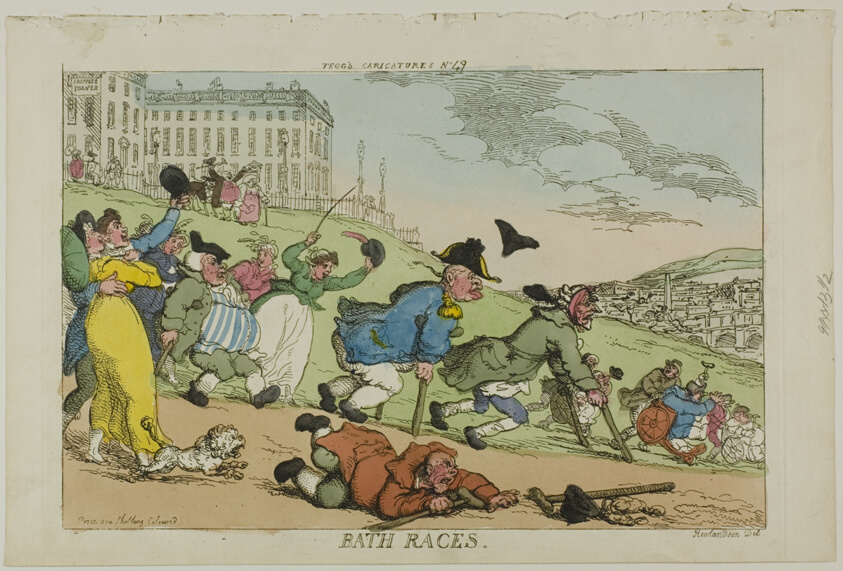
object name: Print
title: Bath Races, from Tegg's Caricatures no. 49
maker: Thomas Rowlandson (English, 1756-1827); published by Thomas Tegg (English, 1776-1845)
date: published November 20, 1810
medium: Hand-colored etching on ivory wove paper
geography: England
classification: etching; print; prints and drawing